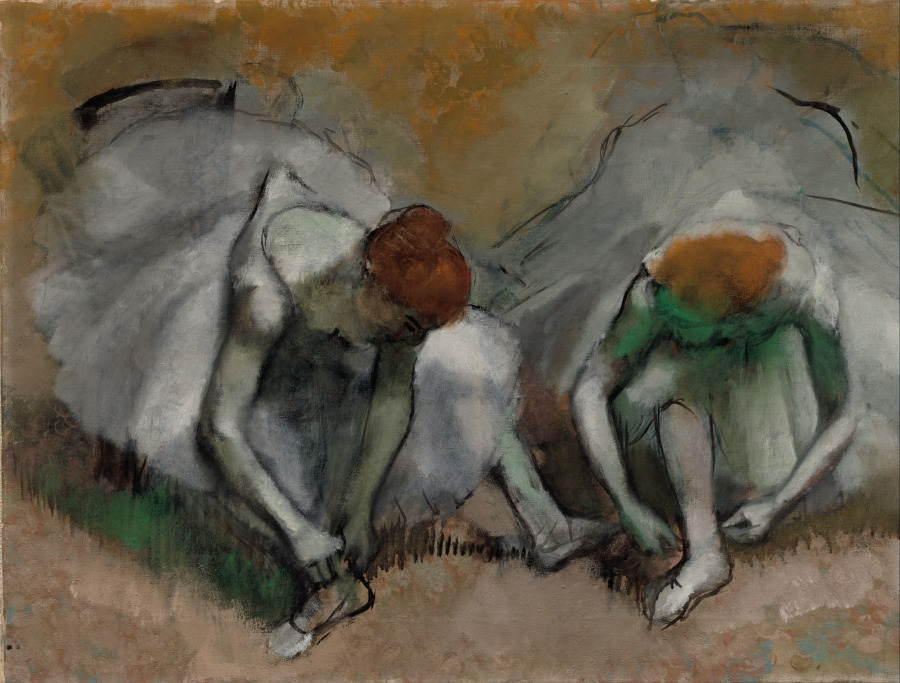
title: Frieze of Dancers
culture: France, 19th century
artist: Edgar Degas (French, 1834–1917)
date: c. 1895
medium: oil on fabric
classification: Painting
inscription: Signed in lower right: Degas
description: This painting may depict a single dancer seen from four different viewpoints. The young woman is placed in an undefined setting, surrounded by mere wisps of color, applied so spontaneously that the paint ran and dripped. Degas even added the circles in the foreground with his thumb. Such audacity, while acceptable in a small sketch, must have shocked the artist's contemporaries when presented on a six-foot canvas. Equally radical is the idea of combining multiple views of a single figure. Degas's unusual presentation may have been inspired by the photographs of Eadweard Muybridge (1830-1904)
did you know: The ballet is a subject Degas returned to again and again over the course of his career. Rather than public performances, he often depicted dancers behind the curtain, practicing, waiting, or, as in this painting, lacing up their shoes.